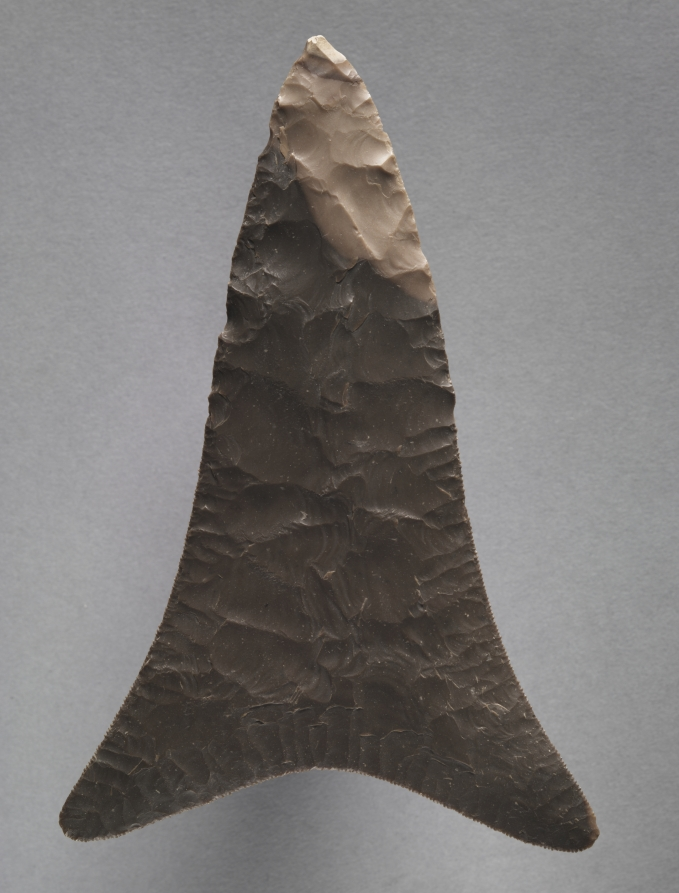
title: Fishtail Knife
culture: Egypt, Predynastic (5000–2950 BCE), Naqada Ia–IIa (3900–3300 BCE)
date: 4500–4000 BCE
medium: dark brown- to dark green-colored flint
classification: Implements